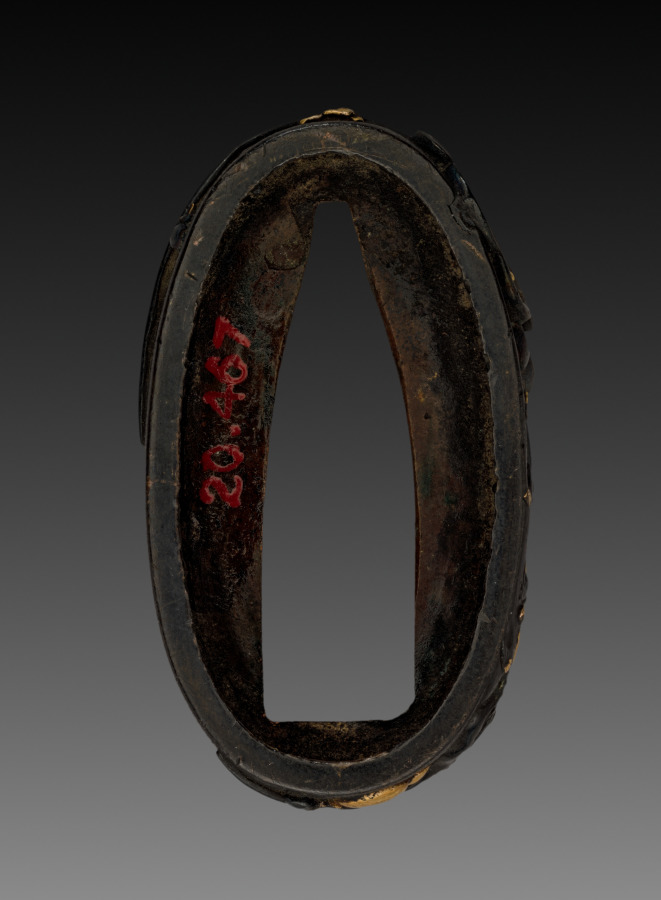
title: Sword-Hilt Collar (Fuchi)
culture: Japan, Edo period (1615–1868)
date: 1700–1850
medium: shakudo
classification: Arms and Armor